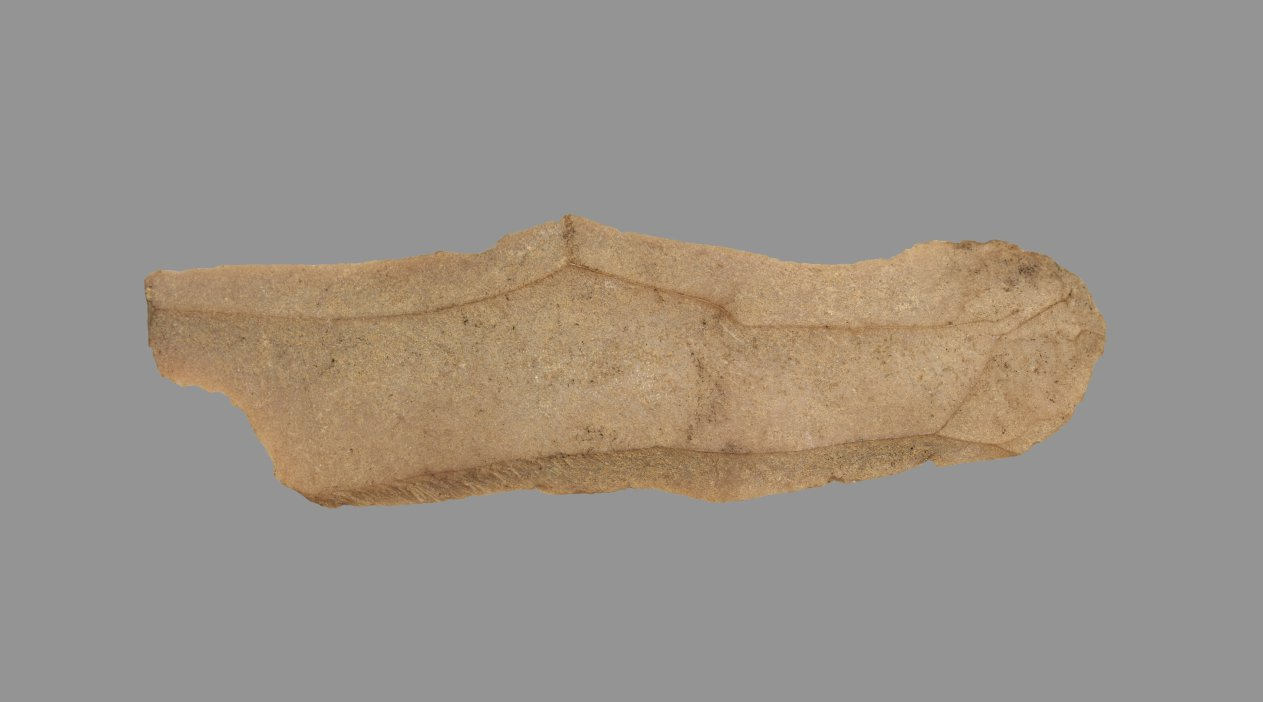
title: Sickle Blade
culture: Egypt, Middle Kingdom (2040–1648 BCE), Dynasty 12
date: 1980–1801 BCE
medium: flint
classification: Implements